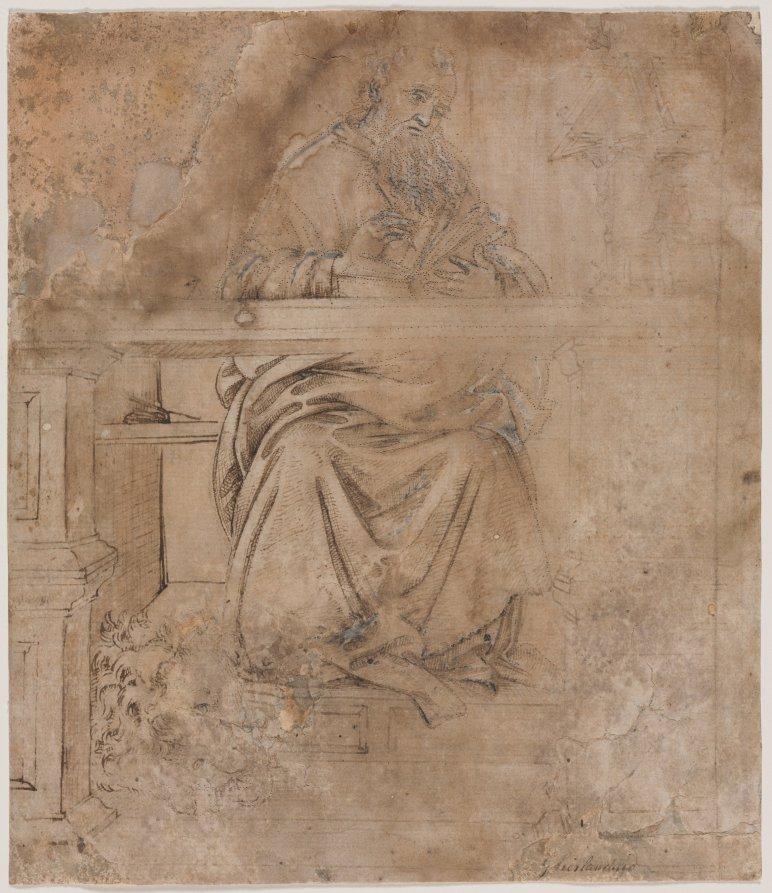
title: St. Jerome in His Study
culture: Italy, 15th century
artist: Filippino Lippi (Italian, c. 1457–1504)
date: c. 1490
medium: pen and brown ink over traces of black chalk(?), with brush and brown wash, heightened with lead white; pricked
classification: Drawing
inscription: lower right, in brown ink: Ghirlandaio ; VERSO, upper left, in brown ink: Domenico Ghirlandaio / Fiorentino ; upper left, in graphite: R. Johnson + 1877 ; lower center, in graphite: A 273